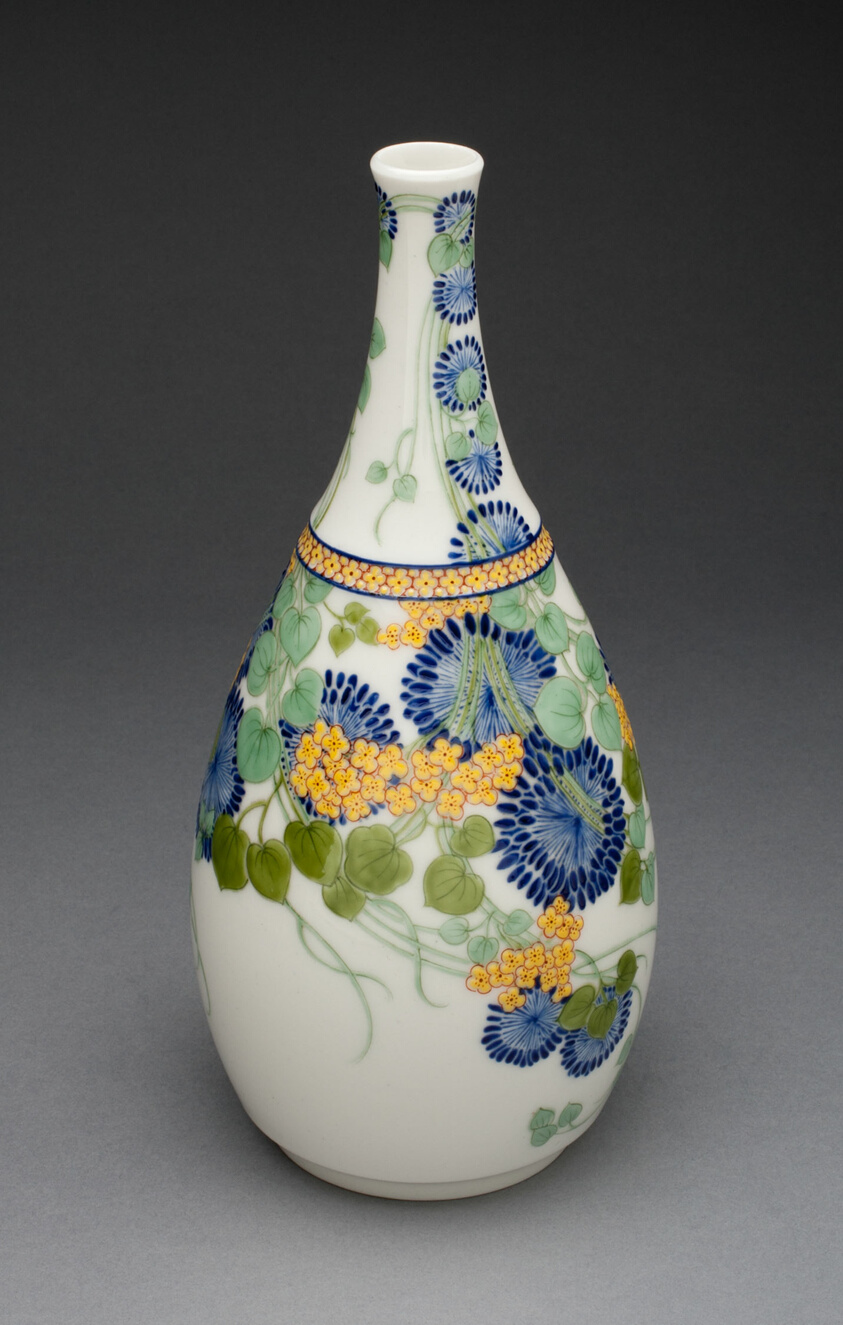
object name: Ceramics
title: Vase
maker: Sèvres Porcelain Manufactory; French, founded 1740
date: 1904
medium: Porcelain with polychrome enamels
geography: Sèvres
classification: vase; vessel; porcelain; ceramics; european decorative arts